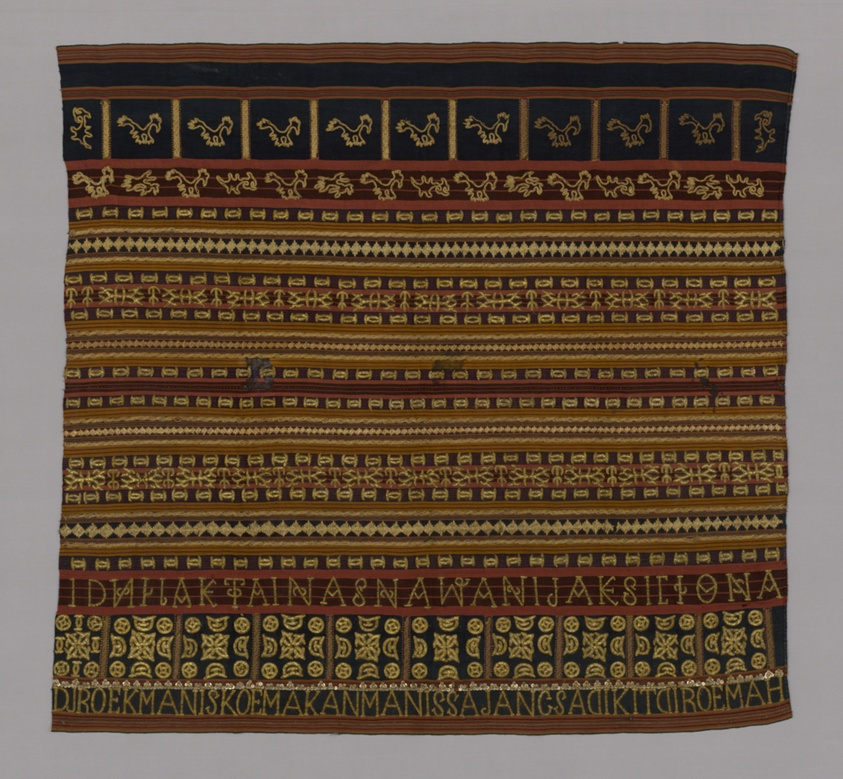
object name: Costume and Accessories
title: Woman's Ceremonial Skirt (Tapis)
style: indonesian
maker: Abung (Indonesia, South Sumatra, Lampung)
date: 19th century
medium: Two panels joined: cotton and silk, warp-faced, weft ribbed plain weave; embroidered with silk, gold-leaf-over-lacquered-paper strip wrapped cotton, cotton, gilt-metal coils, gilt-metal wire wrapped cotton ,gilt-metal-strip wrapped cotton and gilt-metal spangles in running stitches; laidwork, couching, and padded couching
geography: Indonesia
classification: needlework (visual works); costume